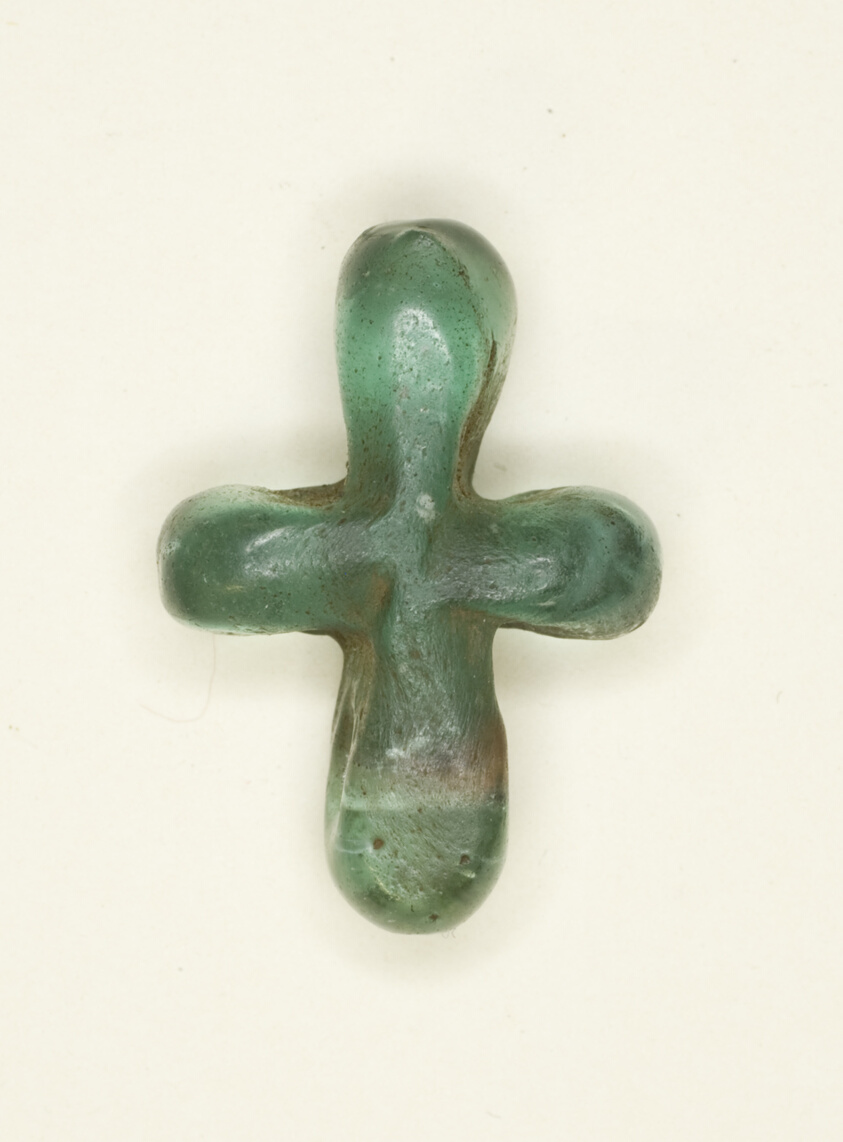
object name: Costume and Accessories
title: Amulet of a Cross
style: coptic (period)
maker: Byzantine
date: Byzantine Period, 4th century or later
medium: Glass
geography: Egypt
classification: ceramics; jewelry; bead; ancient art; costume